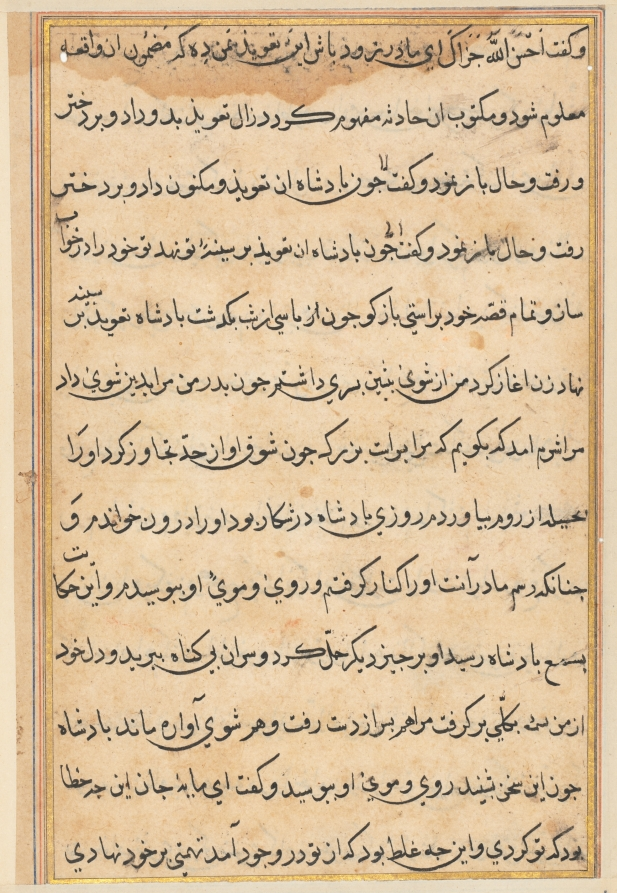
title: Page from Tales of a Parrot (Tuti-nama): text page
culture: Mughal India, court of Akbar (reigned 1556–1605)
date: c. 1560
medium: gum tempera, ink, and gold on paper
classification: Painting